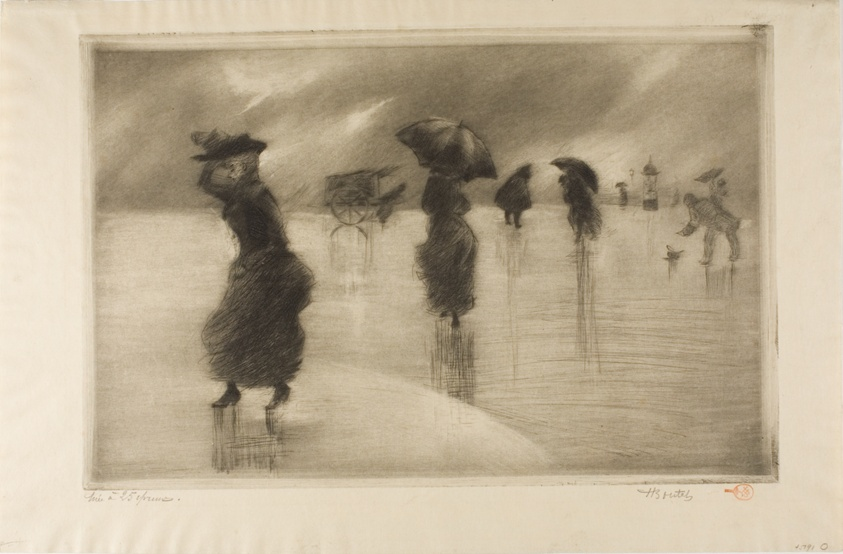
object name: Print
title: The Shower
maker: Henri Boutet (French, 1851-1919)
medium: Aquatint and drypoint on cream wove paper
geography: France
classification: etching; print; prints and drawing